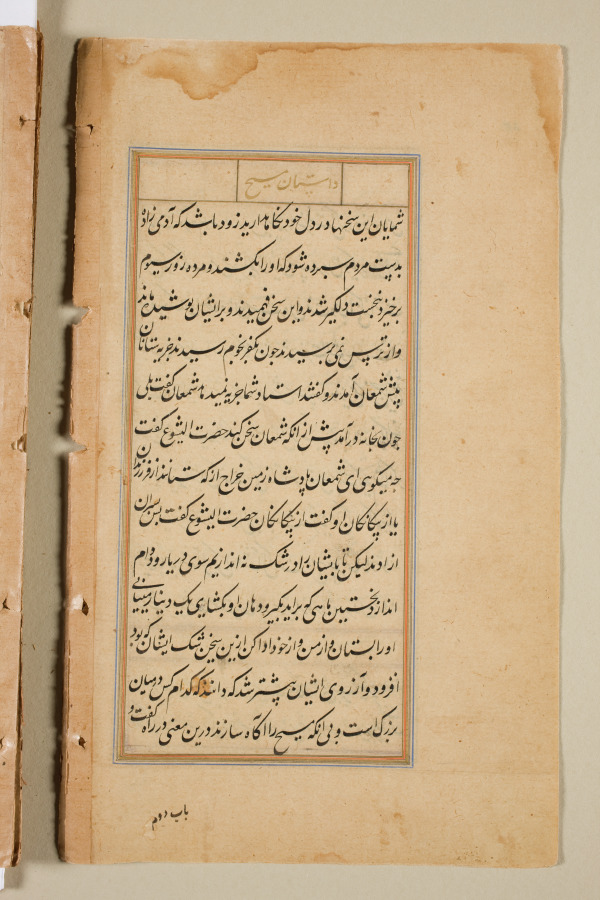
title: Text page from a Mirror of Holiness (Mir’at al-quds) of Father Jerome Xavier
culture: Mughal India, Allahabad, made for Prince Salim (1569–1627)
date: 1602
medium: Ink and gold on paper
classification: Manuscript